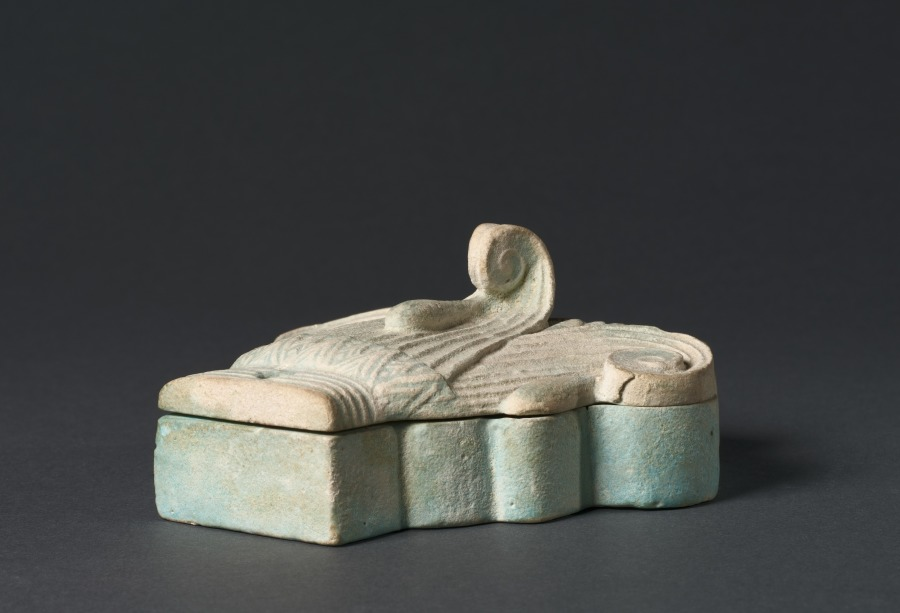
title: Box (Pyxis) in the Form of a Composite Capital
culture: Egypt, Greco-Roman period (332 BCE–395 CE), Ptolemaic dynasty (305–30 BCE)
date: 305–30 BCE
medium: pale robin's-egg blue faience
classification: Vessels